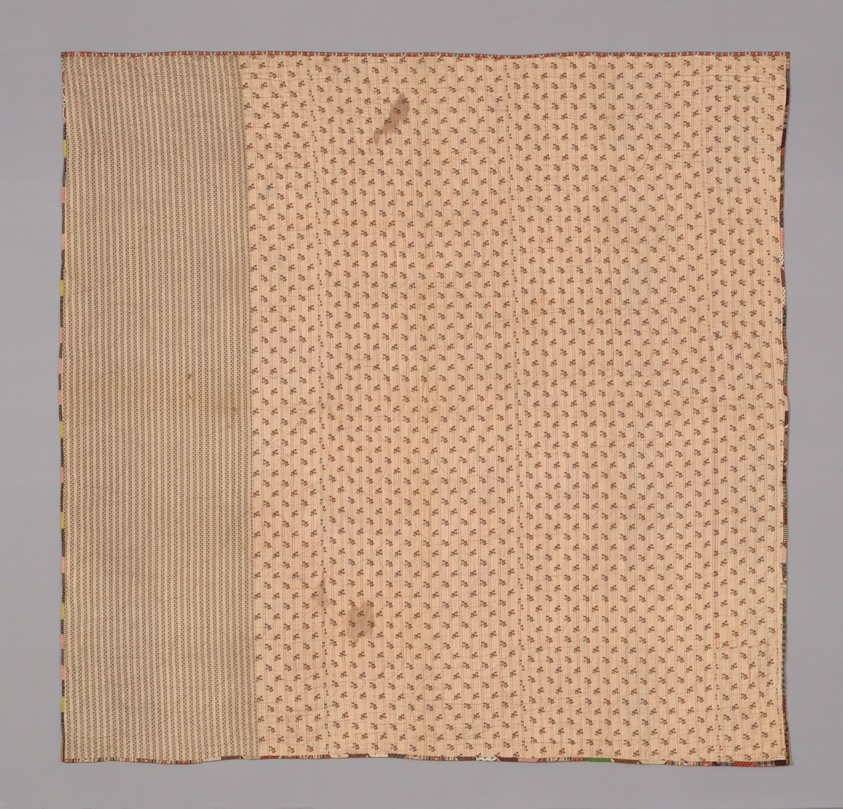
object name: Textile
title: Philadelphia Centennial Exhibition Quilt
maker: United States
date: 1876/1900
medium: Pieced quilt; dyed and printed cotton and wool plain and patterned weave fabrics; printed cotton handkerchief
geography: United States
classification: needlework - quilt; textile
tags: commemoration, propaganda, pennsylvania, exhibitions, geometric, checkerboards, paisley, triangles, presidents, united states of america, medallions, buildings